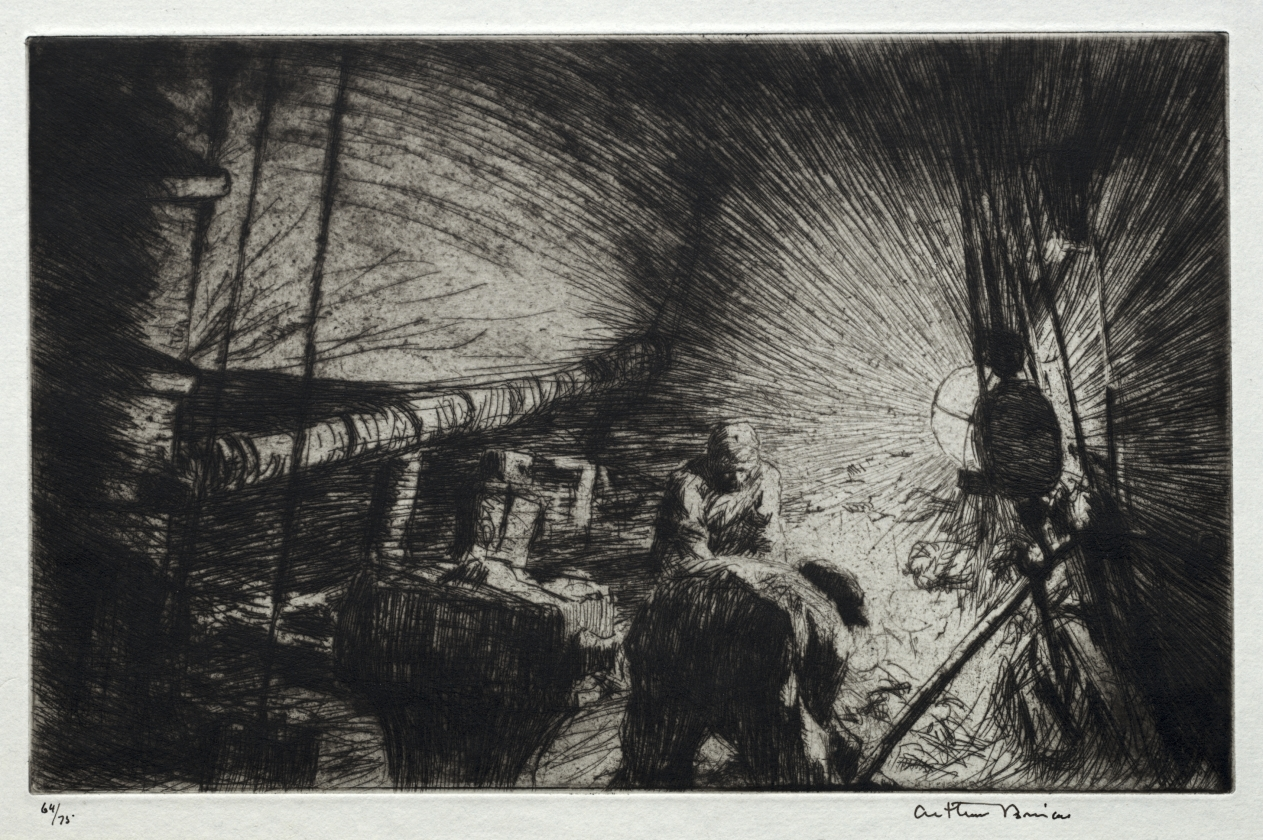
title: Sorting Fish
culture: England, 20th century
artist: Arthur John Trevor Briscoe (British, 1873–1943)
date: 1926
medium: etching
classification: Print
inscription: Lower margin in ink: 64/75 Arthur Briscoe